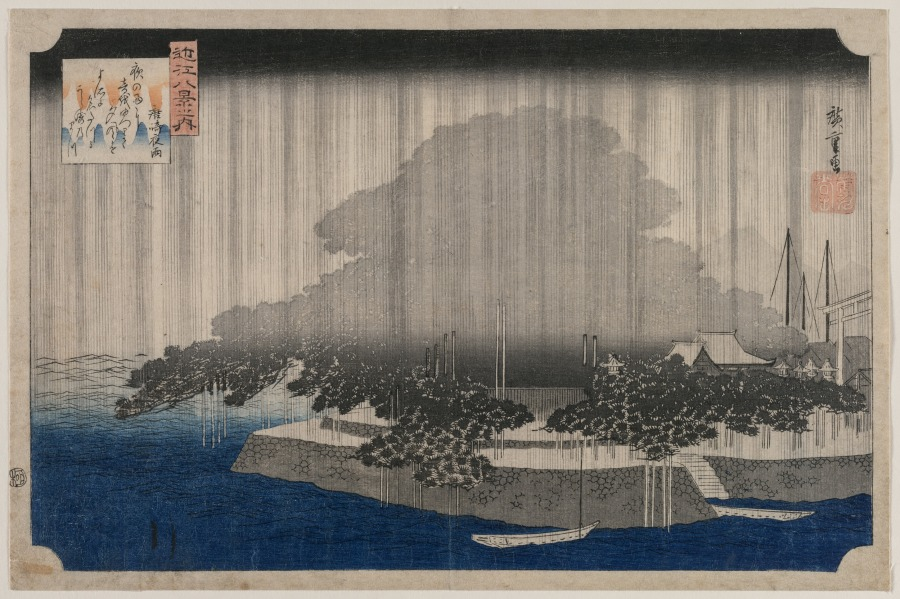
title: Night Rain at Karasaki, from Eight Views of Ōmi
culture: Japan, Edo period (1615–1868)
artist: Utagawa Hiroshige (Japanese, 1797–1858)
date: c. 1835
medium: color woodblock print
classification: Print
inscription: Signature: Hiroshige ga. Publisher: Yamamoto Heikichi (Eikyudo). Censorship Seal: kiwame.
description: The sacred Karasaki Pine was a famous sight on the shores of Lake Biwa. Its branches, supported by a framework of bamboo poles, sheltered a shrine beneath. The poem on this print reads as follows: Yielding to the sound in the evening rain, and drawing near to the evening wind, he grows famous, the pine tree of Karasaki. —Translation by Matthi Forrer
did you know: The rain is represented by fine, printed vertical lines.